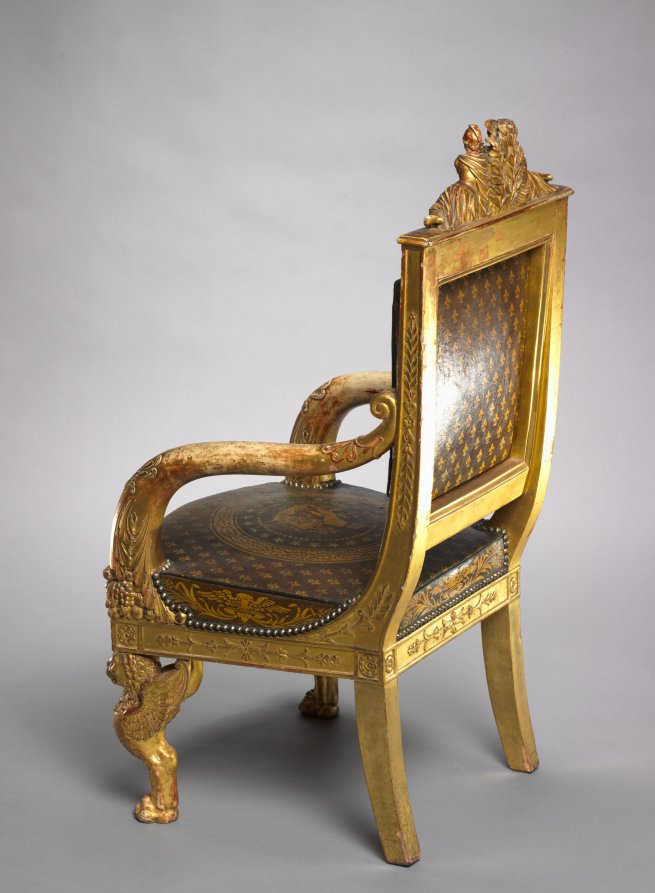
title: Child's Throne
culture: France, Paris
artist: Pierre-Marie Balny le Jeune (French, 1832)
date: 1822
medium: carved and gilded wood, leather upholstery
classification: Furniture and woodwork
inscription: inscribed with stencils inside back rail: BLONDEL TAPISSIER/RUE ST. ANTOINE N 72 1822 inscribed in ink lower edge back rail: 12 JANVIER 18[22?]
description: This chair was made for the young, presumed successor to the French throne who ruled briefly as Henri V in 1830, the last of the direct Bourbon line. He is depicted at the center of the top rail protected by female figures representing France and Minerva, the Roman goddess of wisdom. Fleurs-de-lis and the Gallic rooster, symbols of French royalty and the French people, decorate the upholstery.